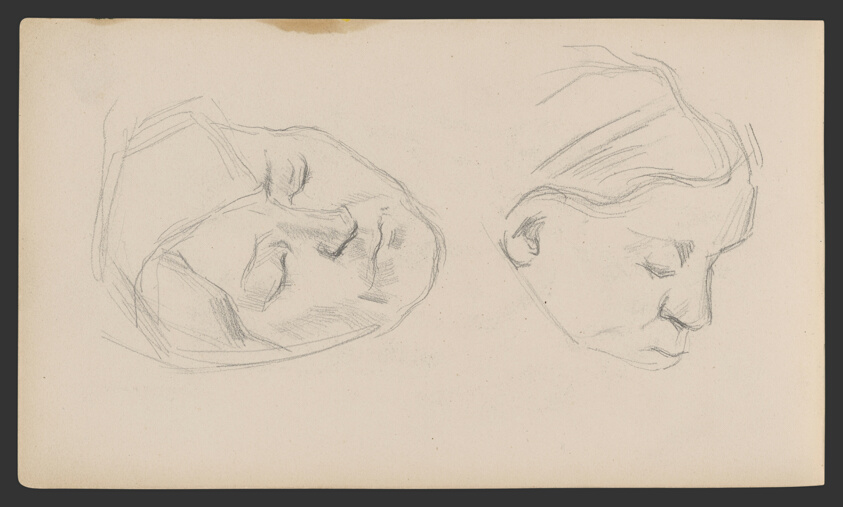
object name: Drawing and Watercolor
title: Sketchbook No. 2 (L'Estaque)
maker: Paul Cézanne; French, 1839-1906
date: 1875–86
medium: Graphite and pen and ink drawings on paper, bound into a book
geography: France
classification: sketchbook; graphite; prints and drawing; paper